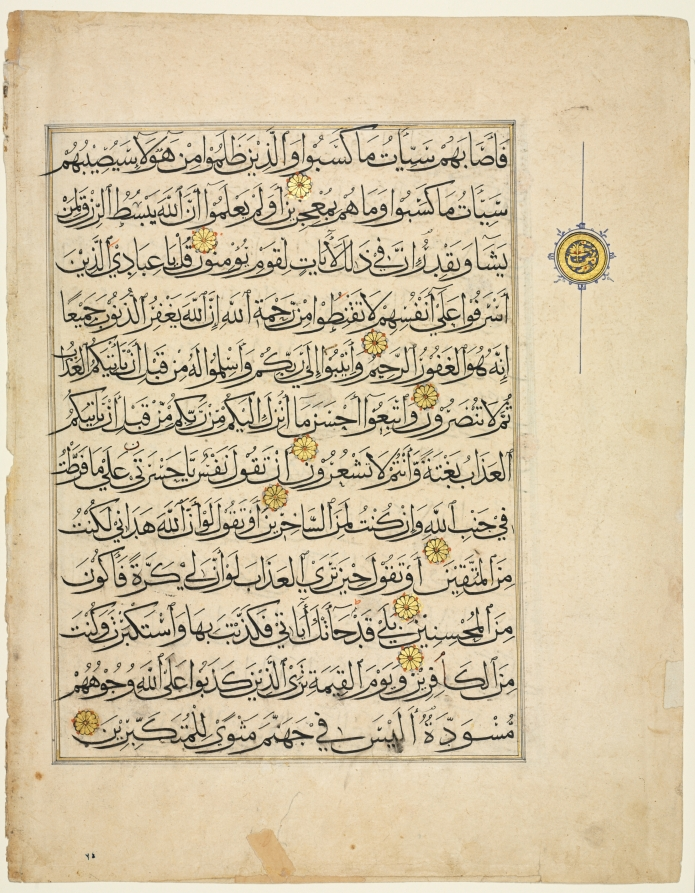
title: Qur'an Manuscript Folio (verso)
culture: Egypt, Mamluk sultanate (1250–1517)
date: 1300s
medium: ink, gold, and colors on paper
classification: Drawing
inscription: Surah al-Zumar [Chapter:The Crowds] 39: 51-60 in Arabic. Script: Rayhani (twelve lines to a page)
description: The text includes verses from chapter 39 of the Qur’an, Surah al-Zumar. The Arabic text is written in Rayhani script, one of the six official scripts of Perso-Arabic calligraphy, and ornamented with red, blue, and gold rosettes. There is a red, blue, and gold roundel in the border on the verso (front).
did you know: The text is from chapter 39 of the Qur'an, "Surah al-Zumar." Verses 42–50 are on recto, while 51–60 are on the verso.